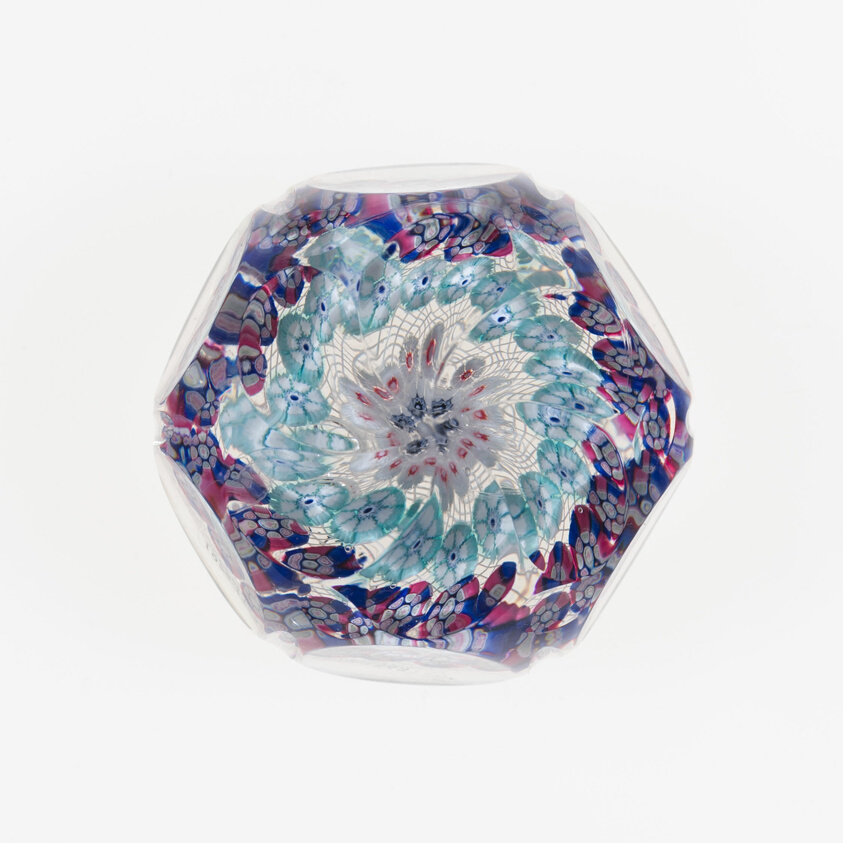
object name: Glass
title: Paperweight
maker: American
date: Late 19th century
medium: Glass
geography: United States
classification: paperweight; millefiori; european decorative arts; glass